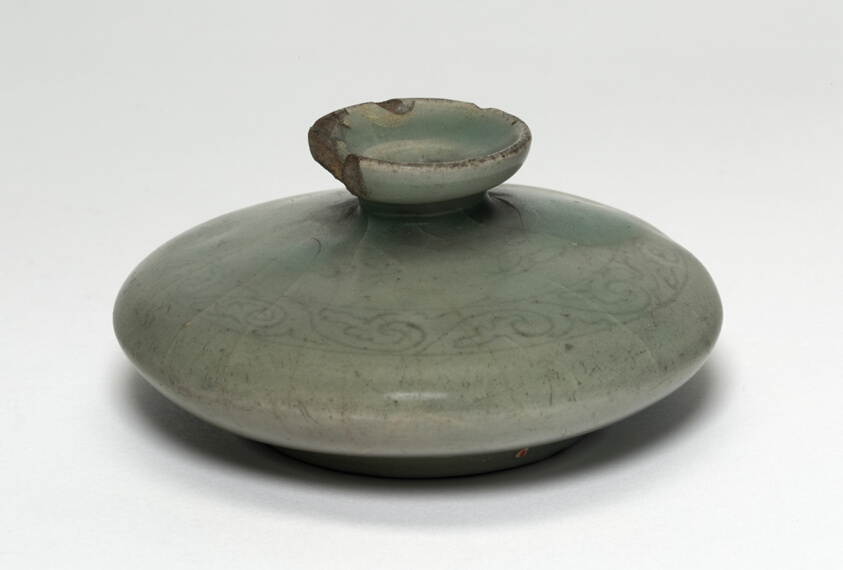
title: Oil bottle with Cloud Design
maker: Korea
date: Goryeo dynasty (918–1392), late 12th century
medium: Celadon-glazed stoneware with underglaze inlaid decoration of black clay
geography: Korea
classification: ceramics; asian art